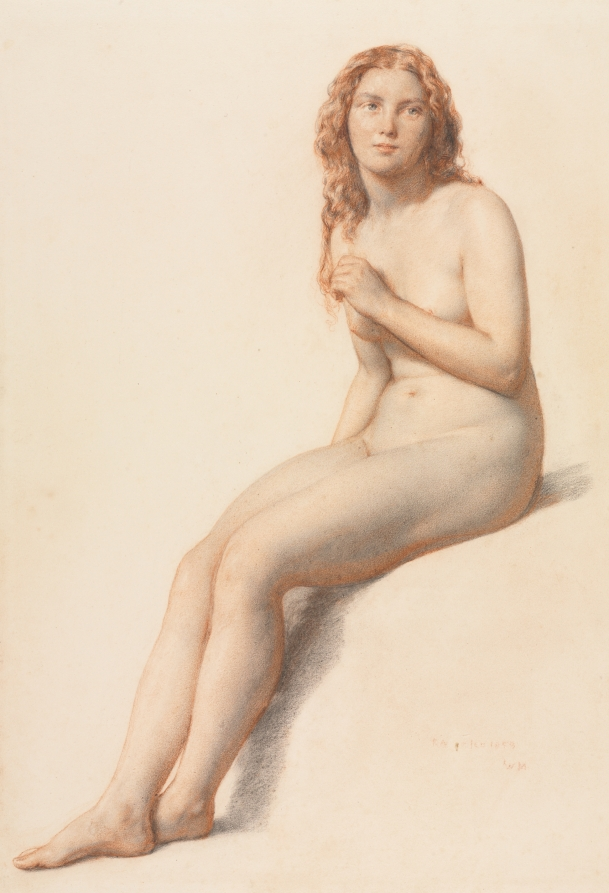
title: Female Nude, Seated, Three Quarter View from Front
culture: England, 19th century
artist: William Mulready (British, 1786–1863)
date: 1859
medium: black and red crayon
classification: Drawing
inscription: inscribed, in red chalk (rubbed), at lower right: RA [?/?] 1859 / WM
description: For William Mulready, drawing was a lifelong preoccupation. This sheet was drawn from a model in the Royal Academy’s life school when the artist was 73. He was one of the academy’s most devoted teachers, positioning the model for his students and then drawing alongside them. Closely observed and meticulously crafted, the work attests to Mulready’s consummate skill as a draftsman.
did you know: In 1863, William Mulready testified before the Royal Commission Enquiry into the Royal Academy in support of the life class as central to academic education.